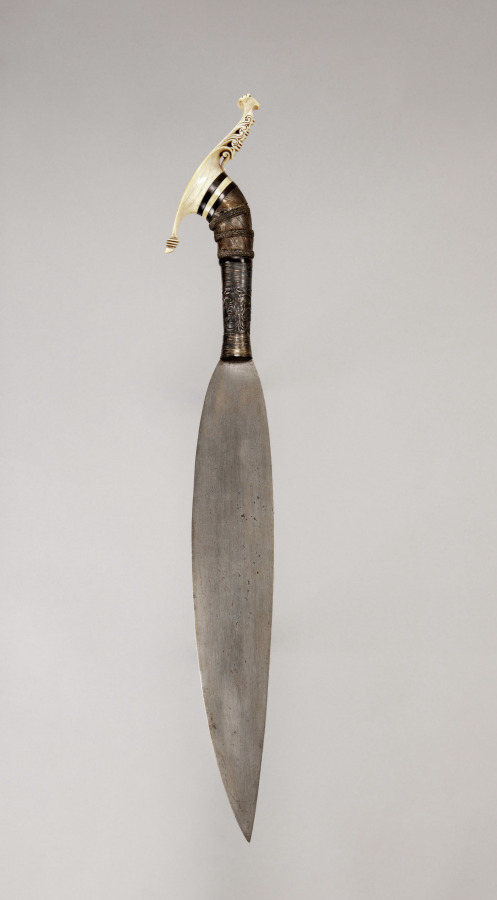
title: Sword (Barong)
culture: Philippines, Mindanao, Sulu Archipelago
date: before 1916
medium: Blade: metal; handle: metal with silver foil and repoussé work; pommel: ivory and carabao horn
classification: Arms and Armor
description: This sword has a broad, leaf-shaped blade characteristic of the Sulu Archipelago. Its profile suggests it was used for powerful cut-and-slash fighting. The hilt terminates in an exceptionally long ivory cockatoo (kakatua) pommel, carved with delicate okir scrollwork. This was an object of authority, status, and ceremonial presence within Tausug culture, probably owned by a member of the datu ruling class.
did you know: The ovular shape on the ivory pommel’s base marks where the nerve of the tooth was.